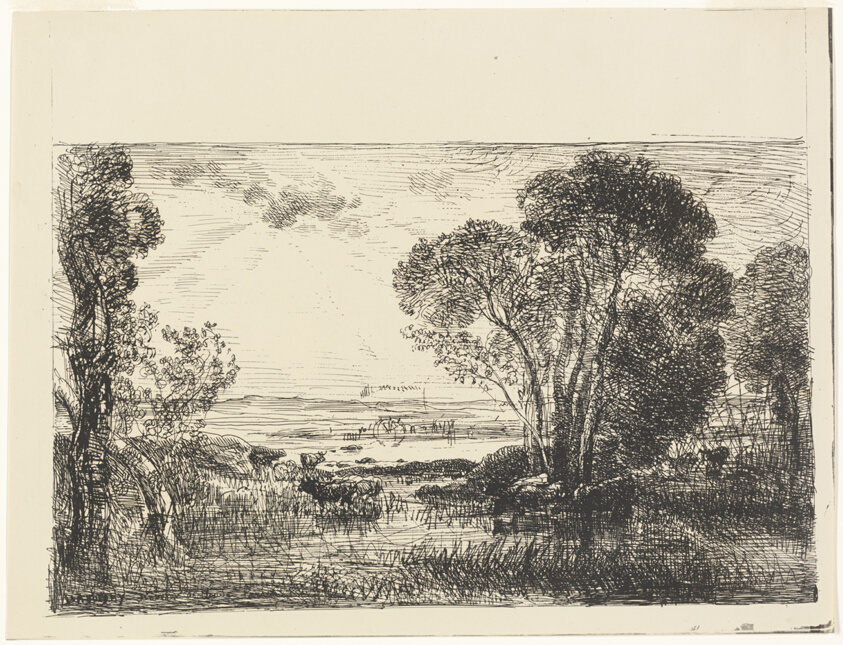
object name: Print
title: The Hydraulic Machine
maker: Charles François Daubigny (French, 1817-1878)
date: 1862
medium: Cliché-verre on ivory photographic paper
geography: France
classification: cliché-verre; print; prints and drawing